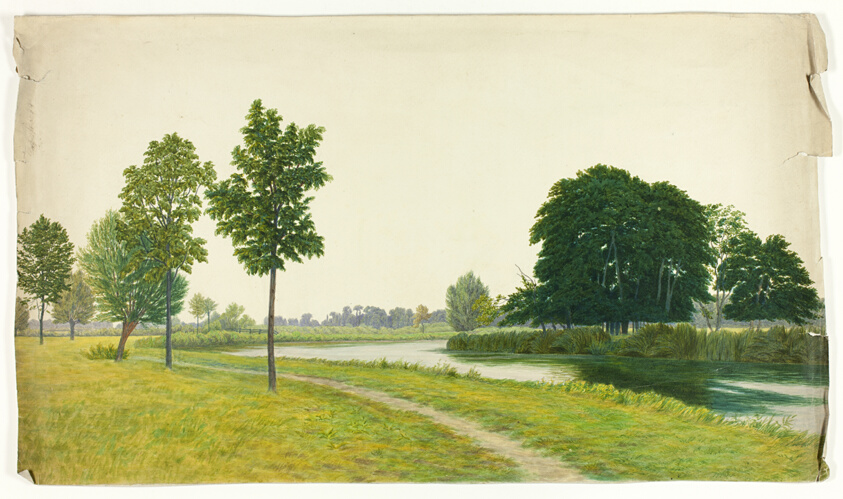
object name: Drawing and Watercolor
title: Tranquil Park Scene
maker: Follower of William Turner; English, 1789-1862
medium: Watercolor, heightened with gum varnish, over traces of graphite, on cream wove paper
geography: United Kingdom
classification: watercolor; paper; drawings (visual works); prints and drawing